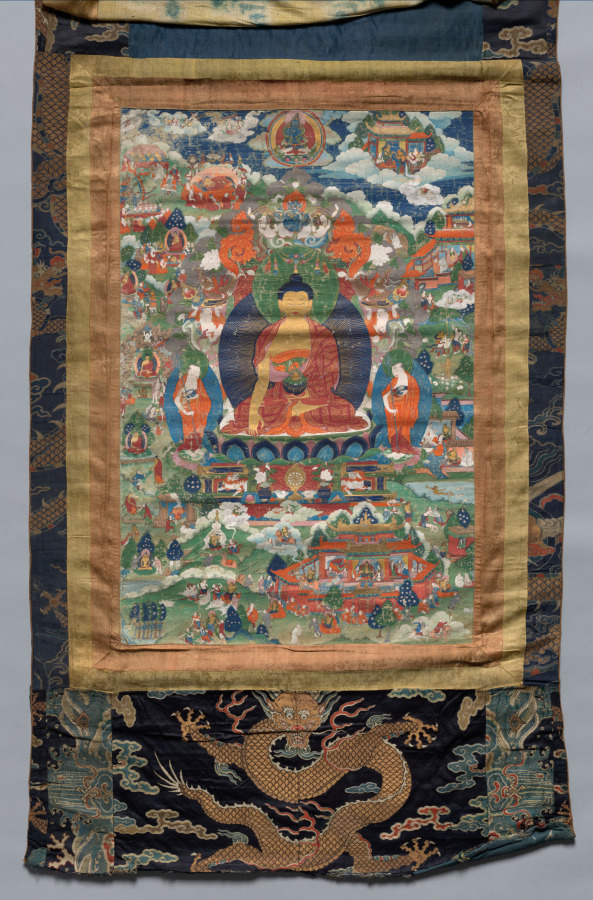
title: Shakyamuni Buddha with scenes from his life story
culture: Tibet, Qing dynasty (1644–1911)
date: c. 1700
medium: gum tempera on cloth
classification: Painting